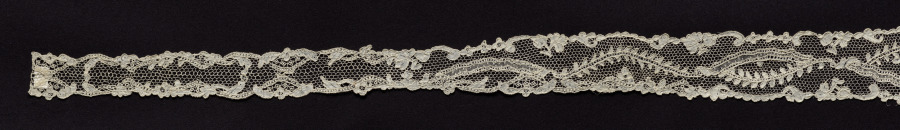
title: Lace Lappet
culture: France, Argentan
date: 1715–74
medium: Linen: needle lace (Point de Argentan)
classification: Lace